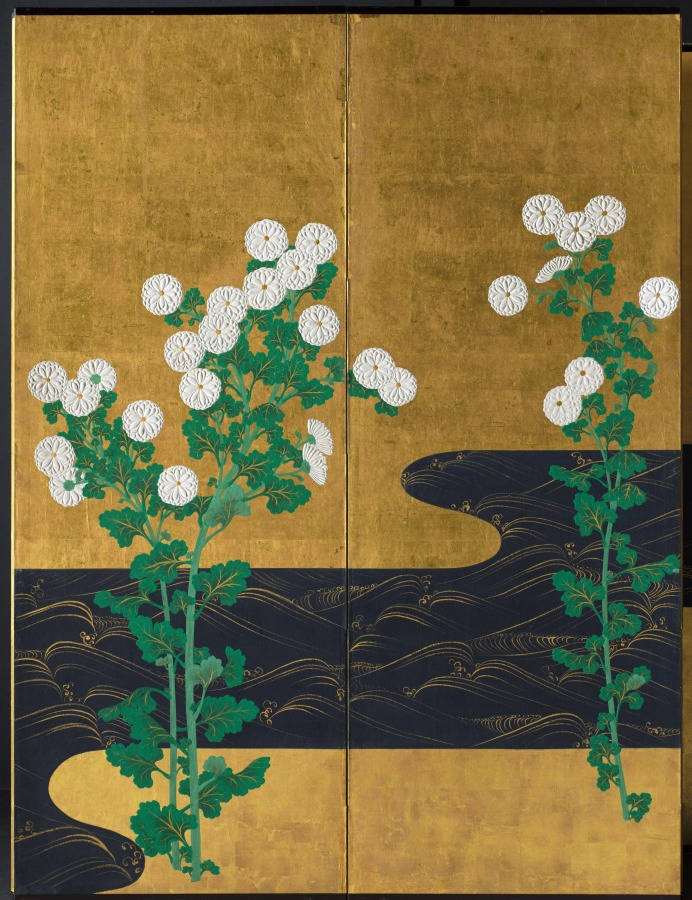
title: Chrysanthemums by a Stream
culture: Japan, Edo period (1615–1868)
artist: possibly by Ogata Kōrin (Japanese, 1658–1716)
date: c. 1715–30 or later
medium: One of a pair of six-panel folding screens; ink and color on gilded paper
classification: Painting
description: These screens recall a painting style so closely identified with Ogata Kōrin (1658–1716) that it is called Rinpa, or “Rin School,” after the ideograph “rin” in his name. The highly stylized background accentuates floral groupings that have been groomed so as to appear utterly artificial, like the synthetic arrangements available today. Kōrin's genius derived in large measure from natural phenomena painstakingly observed and then manipulated to create compositions of startling refinement and sparkling isolation. This process may have grown out of Kōrin's early immersion in the family textile business, a medium that encourages such dramatic distillations of form: the stream's gold-crested waves bring to mind traditional kimono robe designs of Kōrin's era. Works with the signature seen on this painting, including a style name, or persona suggested to Kōrin by his brother Kenzan (1663–1743), are sometimes considered to have been produced either in the last year of his life, when he was very ill, or after his death. In both scenarios, the lion’s share of the work would have been done by studio assistants, but little is truly known of his studio practice. Given the regularity of the gold waves on the stream, and the tension in the arrangement of the chrysanthemums, it is also possible that the screens were made in emulation of Kōrin's designs by a later artist.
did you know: The signature used on these screens may indicate paintings made in the last year of the artist's life, or works completed by his studio after his death.